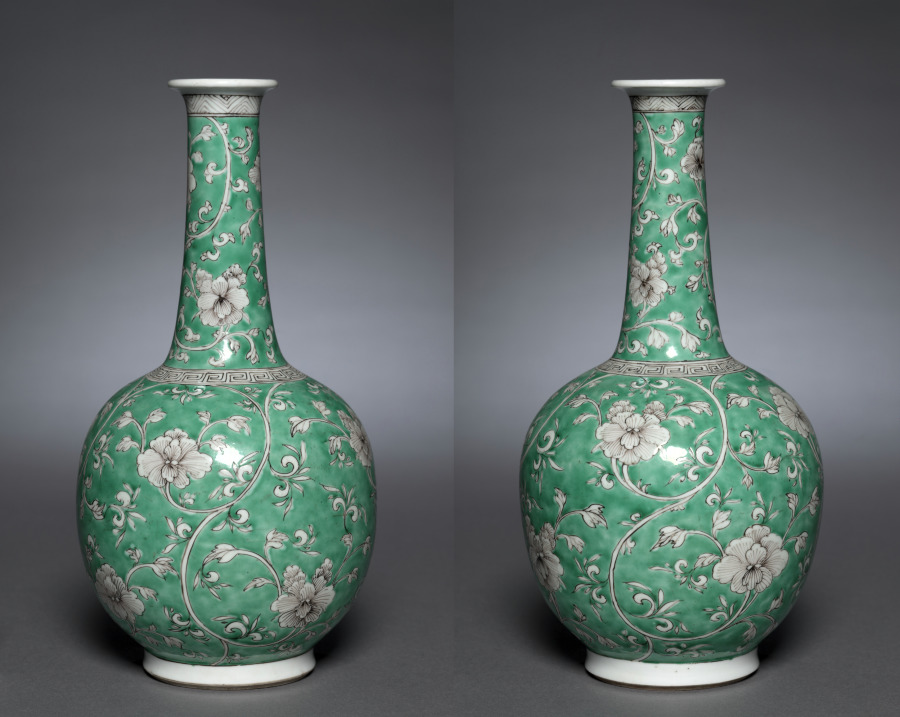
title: Pair of Bottle Vases with Floral Scrolls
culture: China, Qing dynasty (1644-1911), Kangxi reign (1661-1722)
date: 1662–1722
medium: porcelain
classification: Ceramic